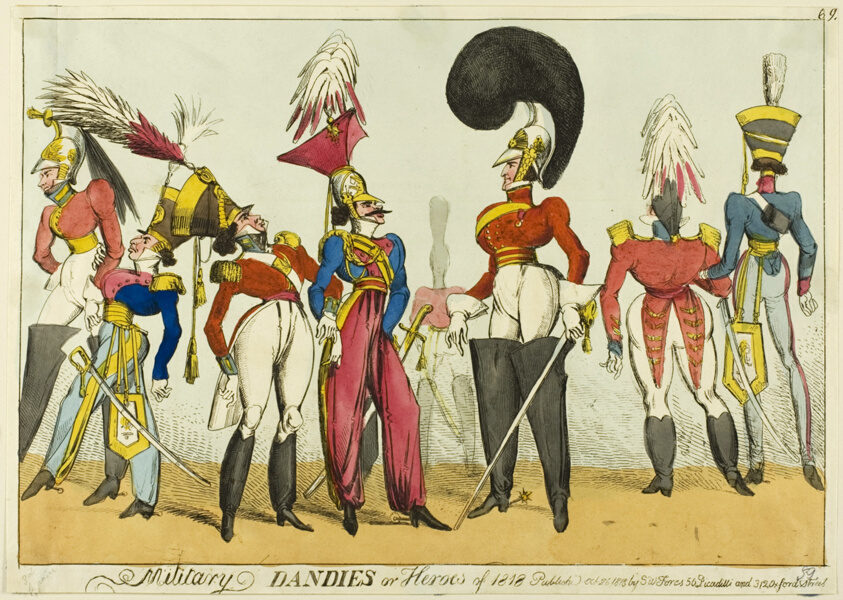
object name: Print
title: Military Dandies or Heroes of 1818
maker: William Heath (English, 1795-1840); published by S. W. Fores (English, active 1785-1825)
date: published October 26, 1818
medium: Hand-colored etching on ivory laid paper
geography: England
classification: etching; print; prints and drawing